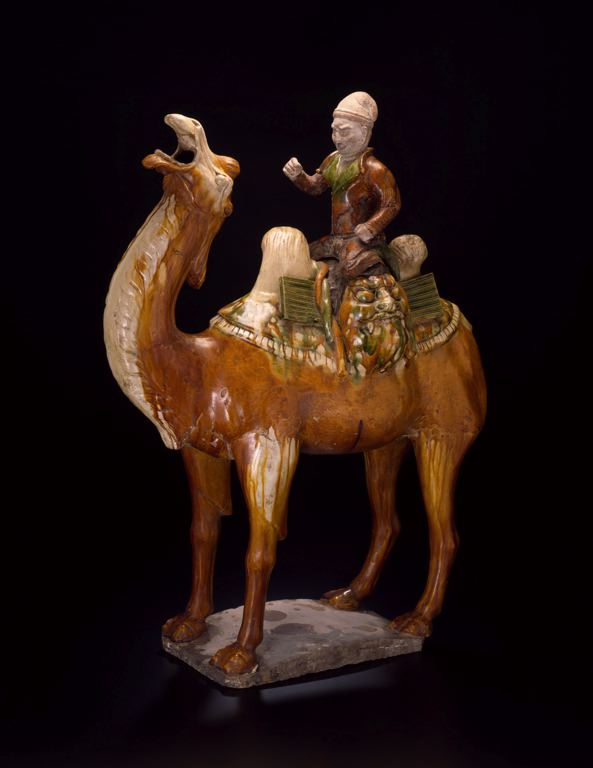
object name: Sculpture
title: Camel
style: Chinese (culture or style)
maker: China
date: Tang dynasty (618–907 A.D.), first half of 8th century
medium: Earthenware with three-color (sancai) lead glazes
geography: China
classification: earthenware; ceramics; sculpture